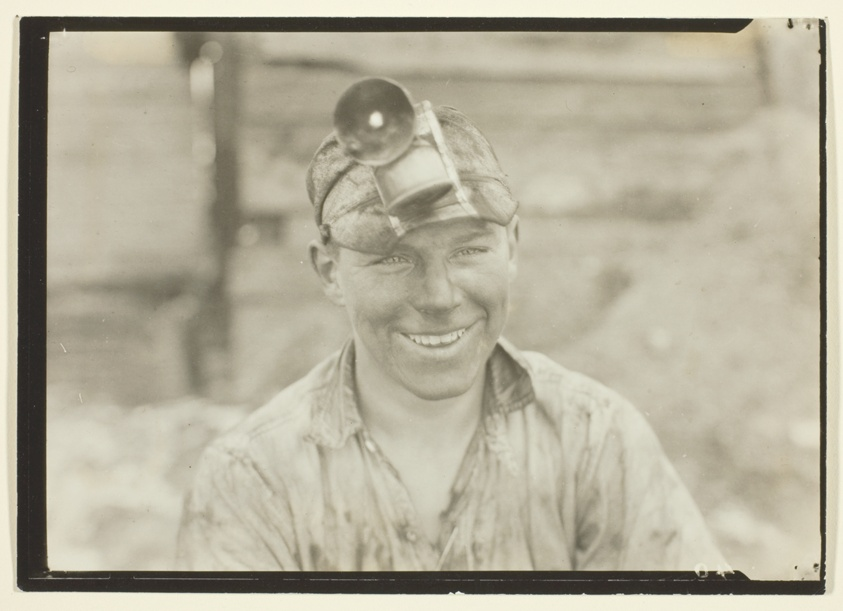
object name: Photograph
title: Young Miner, Pennsylvania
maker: Lewis Wickes Hine (American, 1874–1940)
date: 1920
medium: Gelatin silver print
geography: United States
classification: gelatin silver (developing-out-paper) pr; photographic process; photography; photograph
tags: Collected by Hugh Edwards